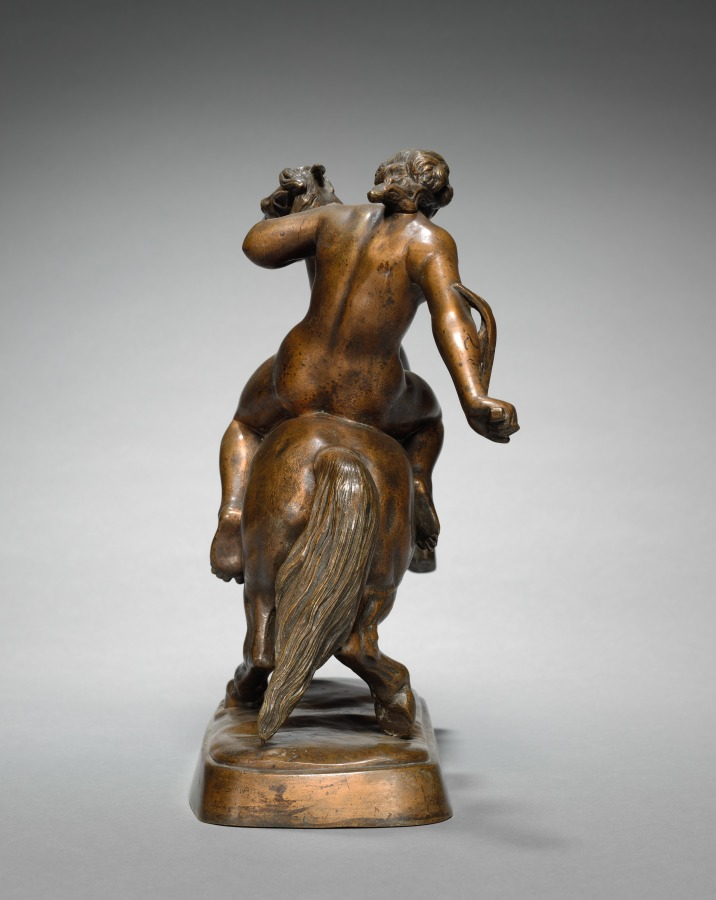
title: Amazon Taming a Horse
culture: France, 19th century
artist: Jean-Jacques Feuchère (French, 1807–1852)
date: c. 1840–1843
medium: bronze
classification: Sculpture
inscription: signed on base: "J. FEUCHÈRE"